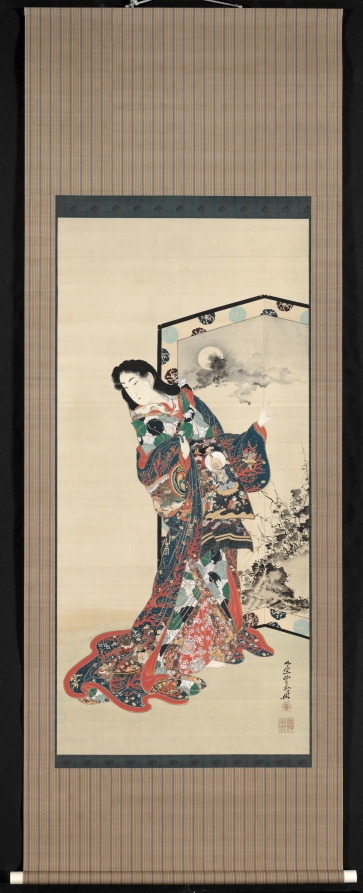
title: Hell Courtesan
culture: Japan, Meiji period (1868–1912)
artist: Kawanabe Kyōsai (Japanese, 1831–1889)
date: 1871–89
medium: Hanging scroll; ink, color, gold, and silver on silk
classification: Painting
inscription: artist's signature and two seals, lower right.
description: Kawanabe Kyōsai repeated this large-scale composition with variations a number of times. In this version, a famous 15th-century courtesan known for wearing a robe with images of the Buddhist hells stands before a folding screen. Legend has it that she was abducted by bandits, and wore the garment to symbolize her belief that her suffering in her current life was punishment for sins committed in a former life. Here, in a parody depiction of the garment, the courtesan stands in for Benzaiten, the goddess of everything that flows, while the remaining members of the Seven Gods of Good Fortune appear on her outer robe. One of them reports sins to Enma, the King of Hell, who is writing out his judgments on the recently deceased.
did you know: The word for longevity appears multiple times in gold and silver on her outer robe.